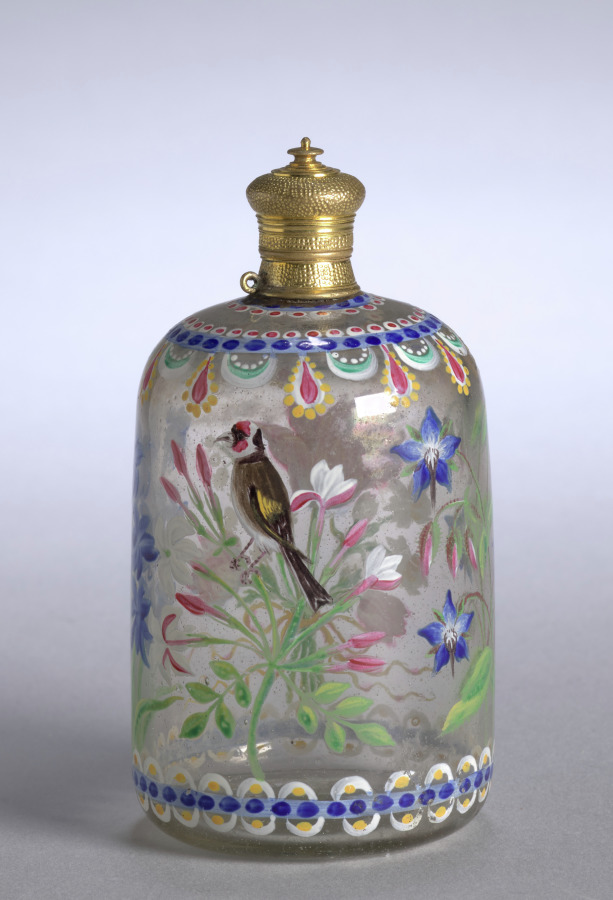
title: Scent Bottle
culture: Germany, 18th century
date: 1700s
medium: glass with enamel decoration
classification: Miscellaneous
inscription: signed: Z. F. a M.